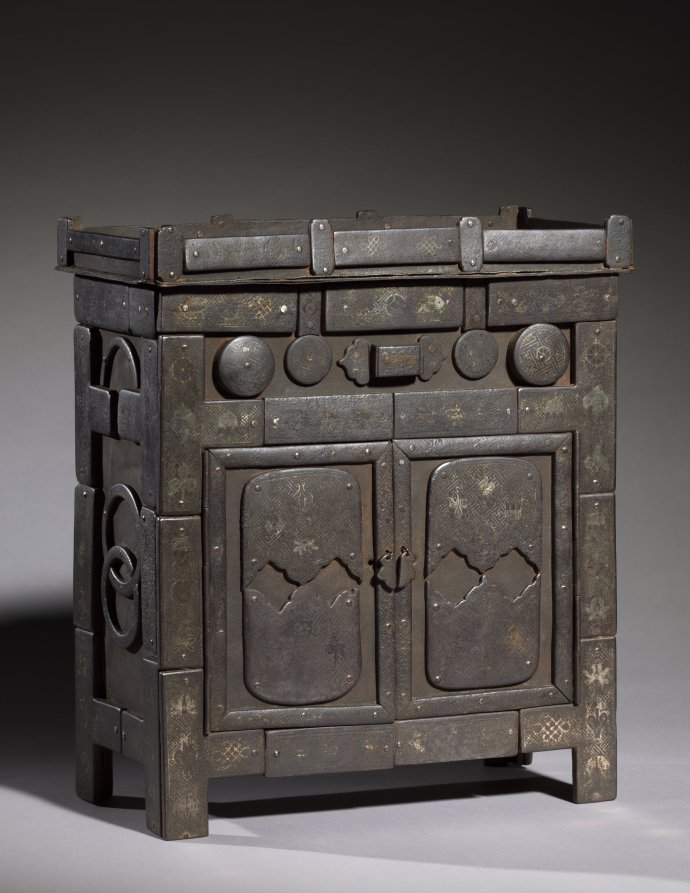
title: Spirit House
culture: Korea, Joseon dynasty (1392–1910)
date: late 1800s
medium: iron inlaid with silver and copper decoration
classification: Metalwork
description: Many homes in premodern Korean society had a memorial shrine for preparing and holding ancestral rites. Placed on the top of a tall chair, this miniature edifice (called the spirit house) served as a temporary residence for visiting ancestral spirits. On the table, a variety of delicacies such as fruits, rice, meat, and wine would be placed to treat those spiritual guests.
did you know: The belief in two types of souls, the spiritual and the corporeal, embodied the core concept of ancestor worship in traditional China and Korea. While the corporeal soul is believed to reside in the tomb, the spiritual soul, in the spirit house, like this example, guards his or her decedents.